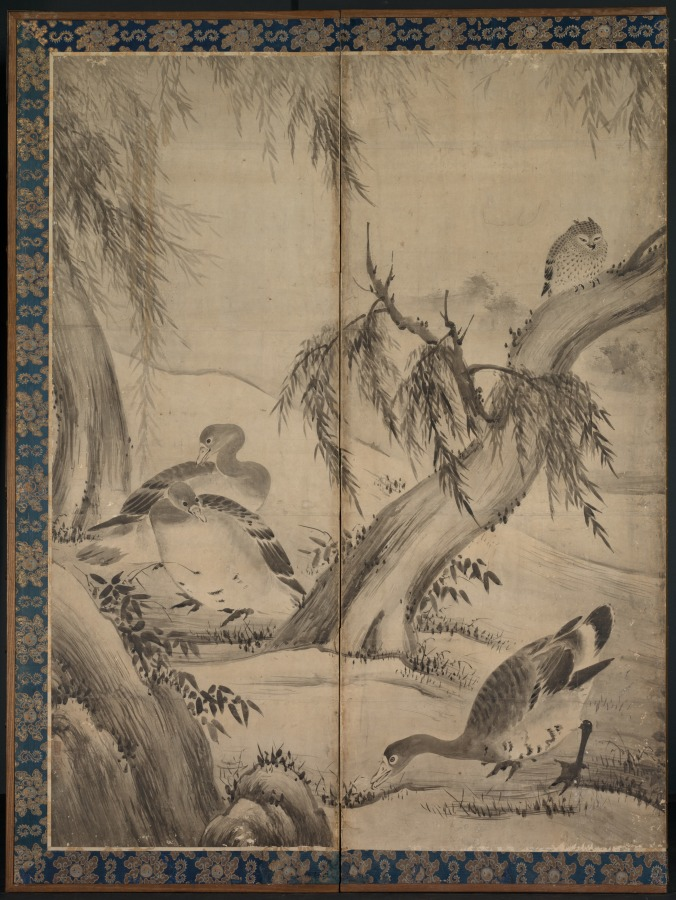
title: Wild Geese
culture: Japan, Edo period (1615–1868)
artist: Kano Sanraku (Japanese, 1559–1635)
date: late 1500s-early 1600s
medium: pair of six-fold screens; ink on paper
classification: Painting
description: Depictions of geese usually appear as ink paintings in Japan during the 1200s. They later show up in the colorful landscapes of illustrated handscrolls. Such early ink renditions of the birds have long been associated with classical Chinese Zen painting and poetry, which was avidly admired and collected in medieval Japan. In the screens on display, the artist portrayed the waterfowl in a pastoral setting without reference to classical or religious themes. Such ordinary subjects were imbued with special meaning in 14th- and 15th-century Japan through associations with continental culture, Zen thought and poetry, and famous Chinese monk-painters whose painting techniques had become revered as visual emblems of Zen principles. The screens here reflect the continuation of that painting tradition in the late 1500s or early 1600s by the head of the most important studio in Kyoto. Sanraku also executed a number of colorful folding screen compositions, but here pays homage to the style of early Zen painting.